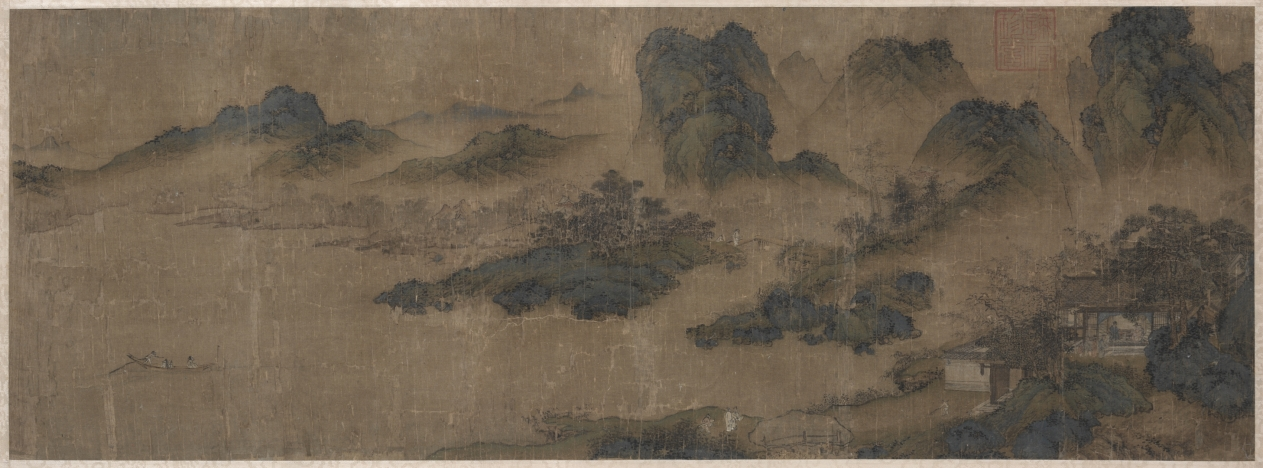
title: Visiting an Old Friend in the Spring Mountains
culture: China, Jaixing, Zhejiang province, Yuan dynasty (1271-1368)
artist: after Sheng Mou (Tzu-chao) (Chinese, active c. 1330–1369)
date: 1300s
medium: Hanging scroll, ink and slight color on silk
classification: Painting